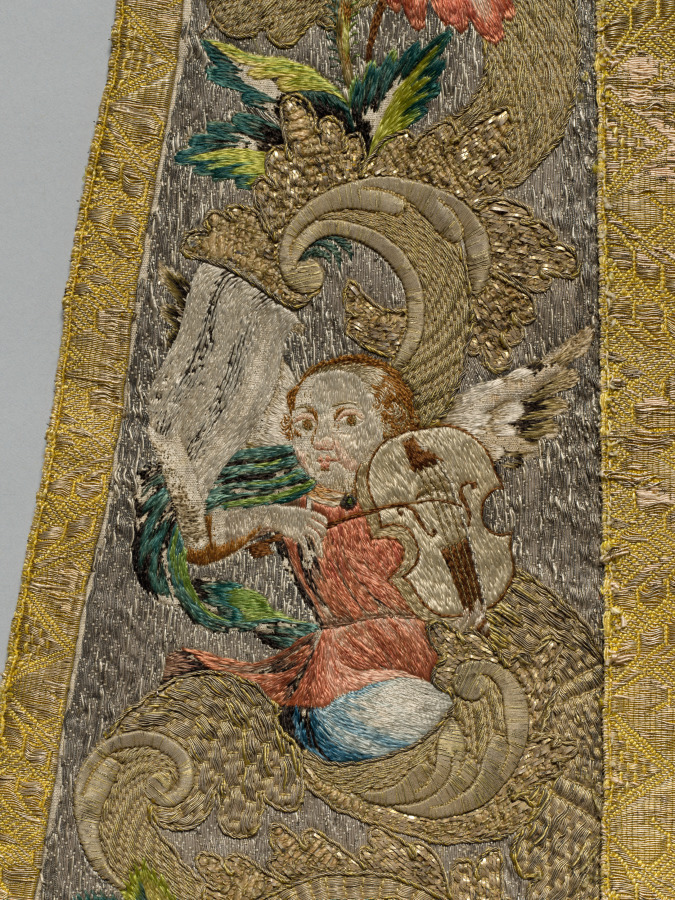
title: Chasuble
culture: Germany, Bavaria, last quarter of 17th century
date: 1675–99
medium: Silk and metallic threads on silk tabby sewn down on a linen tabby ground; embroidery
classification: Embroidery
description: This rare chasuble decorated with angels, musicians, pomegranates, and flowers represents Sacred and Profane Love. This is indicated by two figures—a clear-sighted figure embracing a blindfolded figure—standing on a globe in the upper center and also by the musicians. The angels play soft-sounding instruments (harpsichords, harps, viole da barccio, and flutes) while earthy figures play loud instruments (tambours and hunting horns). The chasuble was most likely part of a liturgical set commissioned for a wedding. This entire chasuble is embroidered with silk and metal thread laid over linen and stitched in place. The exceptionally fine workmanship, lavish use of gold and silver, and brilliant silk thread create this sumptuous vestment.